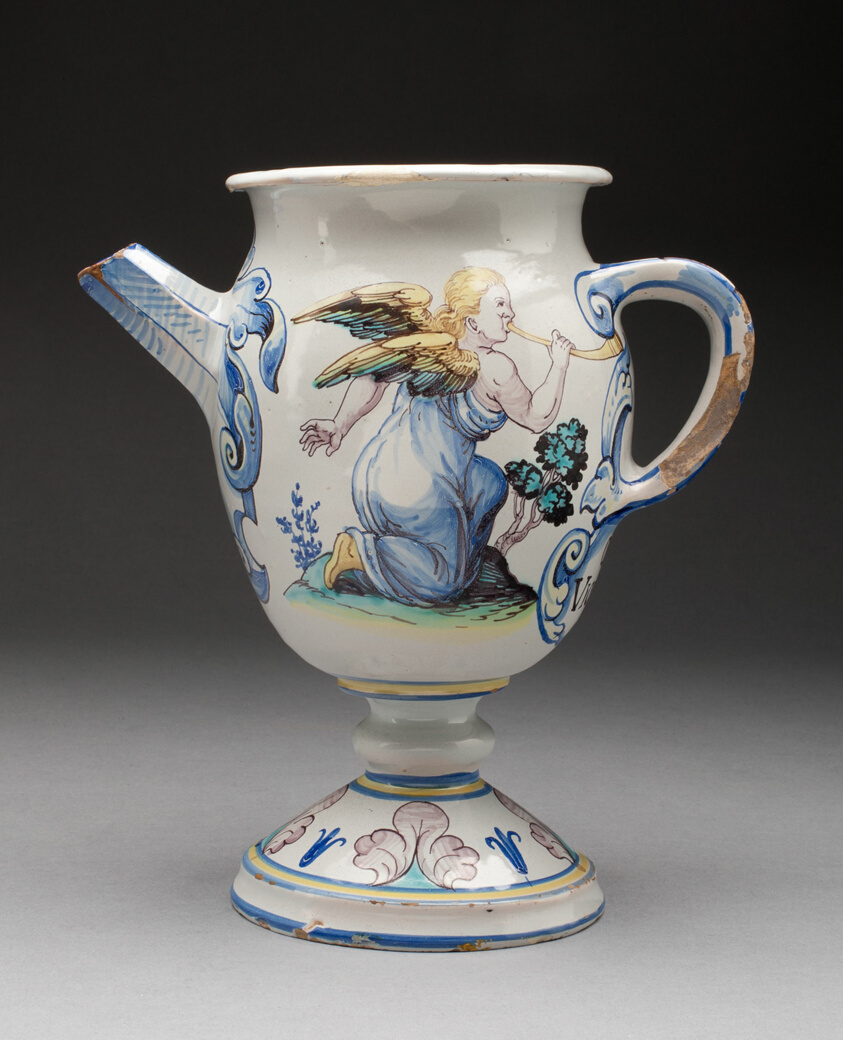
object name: Ceramics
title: Pharmacy Jug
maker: Switzerland, Winterthur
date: c. 1650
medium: Tin-glazed earthenware (faience)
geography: Winterthur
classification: earthenware; european decorative arts; ceramics